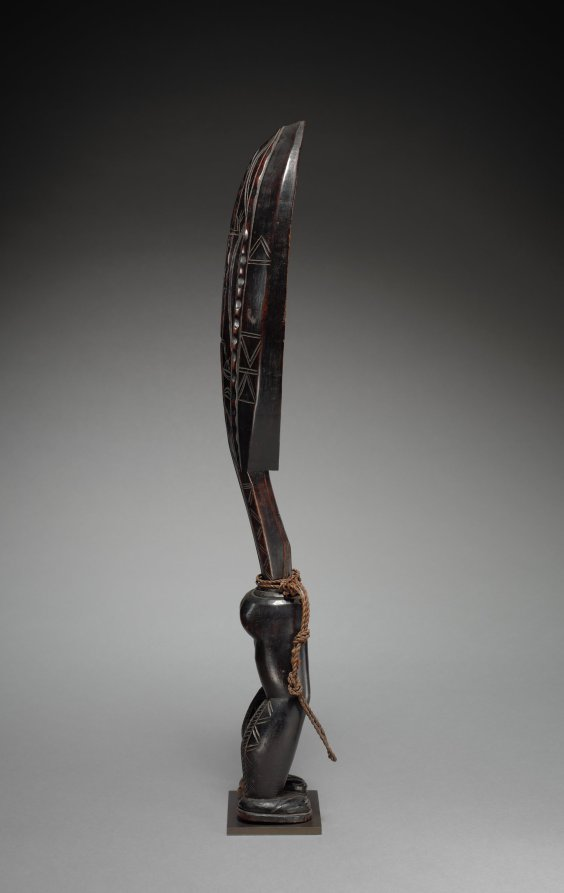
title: Ceremonial Ladle (Wunkirmian or Wakemia)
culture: Africa, West Africa, Côte d'Ivoire, Dan-style carver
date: possibly late 1800s or early 1900s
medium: Wood, twine, and possibly resin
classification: Sculpture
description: An emblem of great prestige, this human-shaped ladle would have been owned by a distinguished married woman recognized for her talents as a farmer and her exceptional generosity and hospitality. One of her responsibilities was to host a grand Feast of Merit when she, along with other highly respected women, prepared food for a large number of local and foreign guests. During the feast the women danced brandishing their rice-filled ladles while singing in strident voices.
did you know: This ladle was a status symbol for a notable woman.